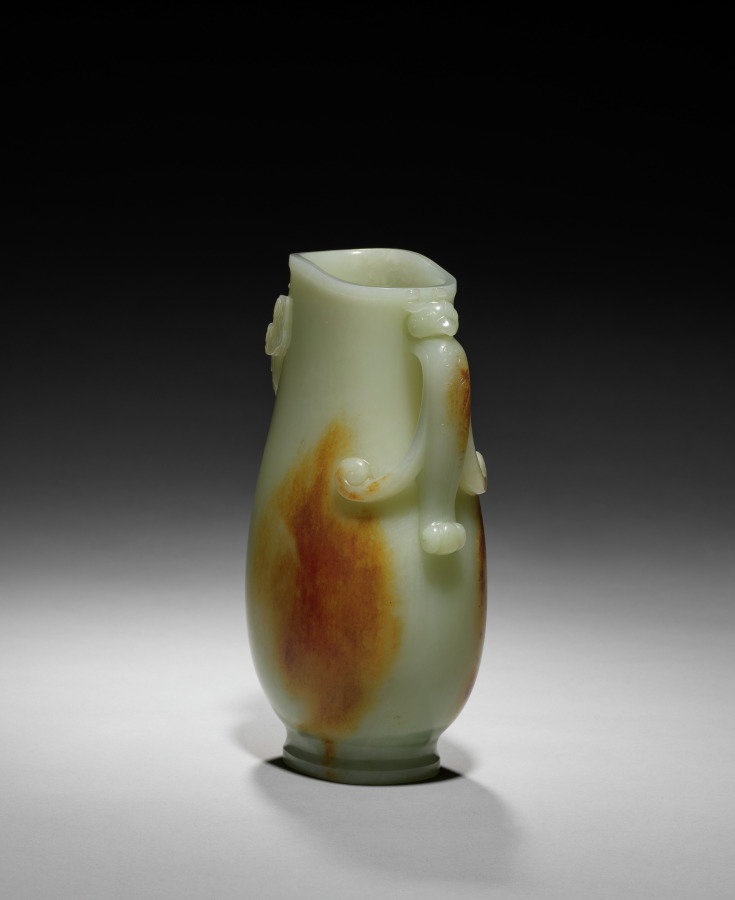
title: Pitcher (Gong) with Dragon and Bird-Headed Handle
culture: China, Qing dynasty (1644–1911)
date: 1700s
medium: pale greenish-white jade with brown markings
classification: Jade